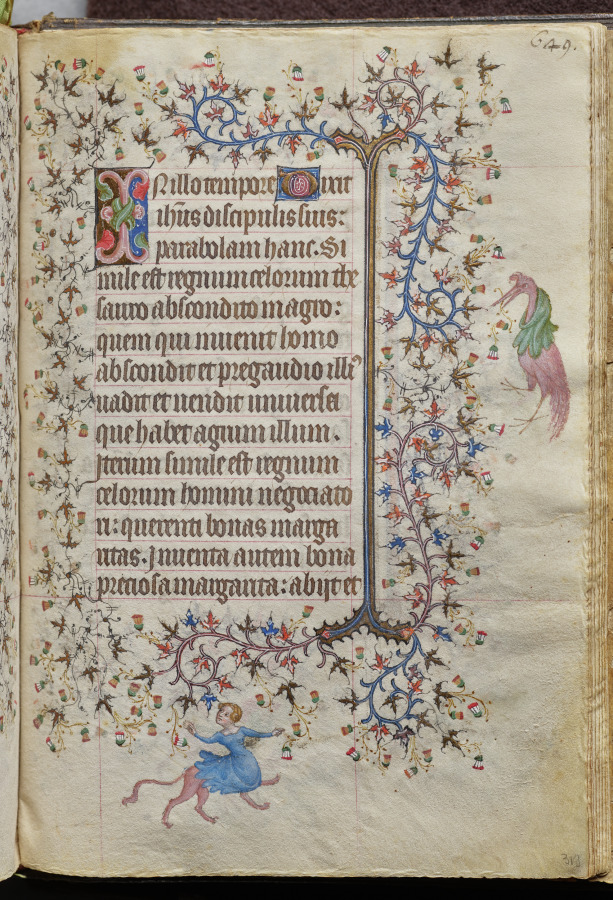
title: Hours of Charles the Noble, King of Navarre (1361-1425), fol. 319r, Text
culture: France, Paris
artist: Master of the Brussels Initials and Associates (French)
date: c. 1405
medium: ink, tempera, and gold on vellum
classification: Bound Volume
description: This precious volume was obviously highly prized by its owner, the French-born King of Navarre, who had his coat of arms painted on no less than twenty folios. Rather than directly commissioning this manuscript from a specific workshop, it seems that Charles the Noble acquired his book of hours -- perhaps ready-made for the luxury market -- while on a trip to Paris in 1404-05. A collaborative effort, six painting styles are evidenced within the pages of this codex, those of two Italians, two Frenchmen, and two Netherlanders. The painter who was responsible for the planning and decoration of the book, and who produced seventeen of the large miniatures, was a Bolognese artist known as the Master of the Brussels Initials. His principal assistant, responsible for most of the borders, was a Florentine who signed his name "Zecho" da Firenze on folio 208 verso.